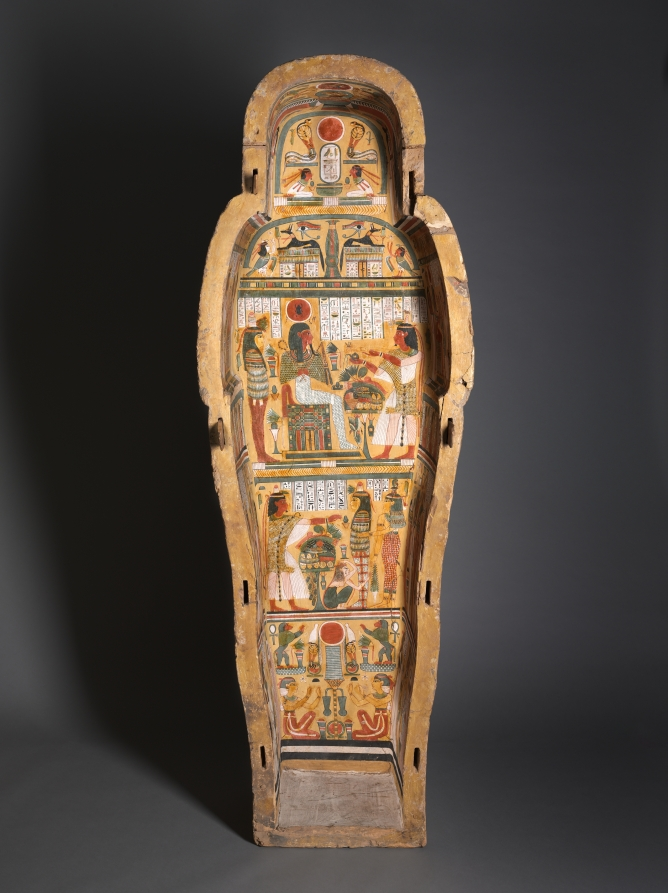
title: Coffin of Nesykhonsu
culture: Egypt, Thebes, Third Intermediate (1069–715 BCE), Dynasties 21–22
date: c. 976–889 BCE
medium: gessoed and painted sycamore fig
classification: Funerary Equipment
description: Egyptian coffins told stories and illustrated spells to help the deceased transition safely to the afterlife. Inside Nesykhonsu's coffin there are two jackals, one facing right and the other left, near the top. Here, the jackal represents the powerful deity Anubis, the god of the afterlife and embalming.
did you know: Two of Nesykhonsu's titles, "Lady of the House" and "Singer of the Choir of Mut the Great," are written on the outside of the coffin.